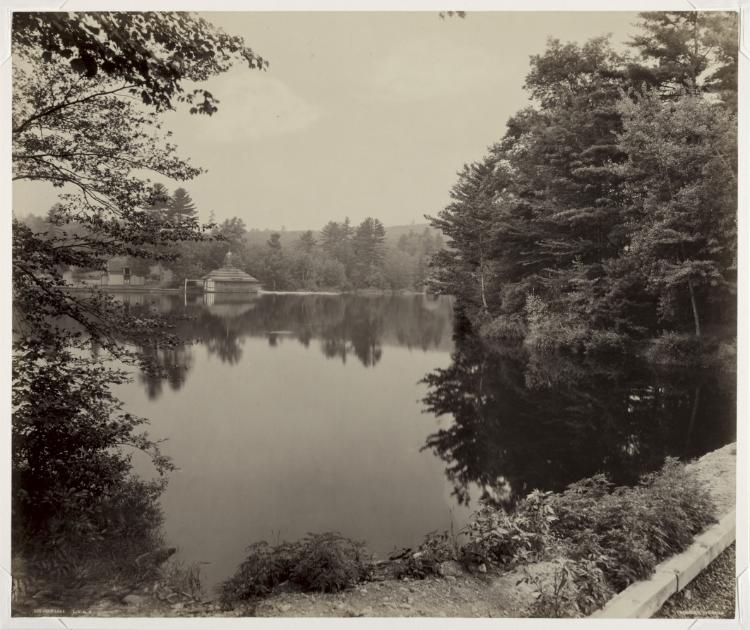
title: Bear Lake, LVRR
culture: America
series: Lehigh Valley Railroad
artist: William H. Rau (American, 1855–1920)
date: c. 1898–99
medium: albumen print from gelatin dry plate negative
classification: Photograph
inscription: Written in negative: "570 BEAR LAKE. L.V.R.R. / WILLIAM H. RAU, PHILA."; in pencil on verso: "LVF 78.1158"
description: A distinguished commercial and documentary landscape photographer in Philadelphia, William H. Rau was commissioned in the 1890s by the Lehigh Valley Railroad to execute a series of scenic views along a new line. Realizing photography's advertising potential, the railroad company employed Rau to select picturesque subjects that might be seen while traveling by rail. Contact-printed from a mammoth plate negative, the landscape's shapes, textures, and tonal ranges are richly detailed.